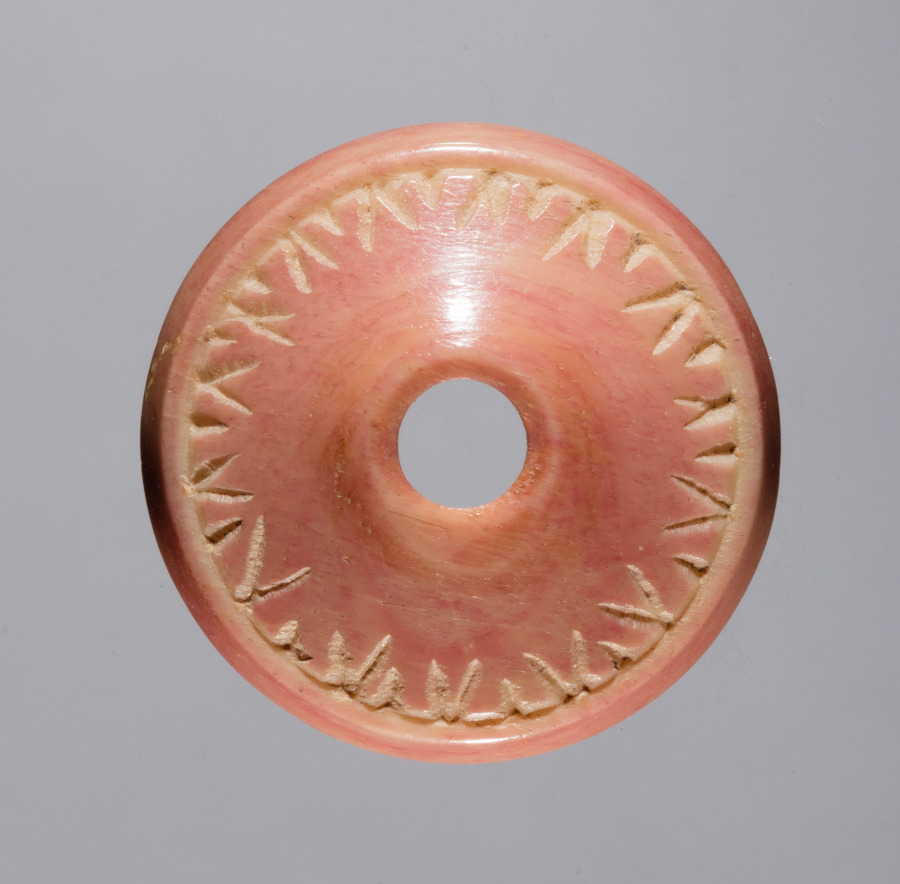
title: Spindle Whorl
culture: Iran, early Islamic period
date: 700s - 900s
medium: bone, incised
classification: Spindle Whorl